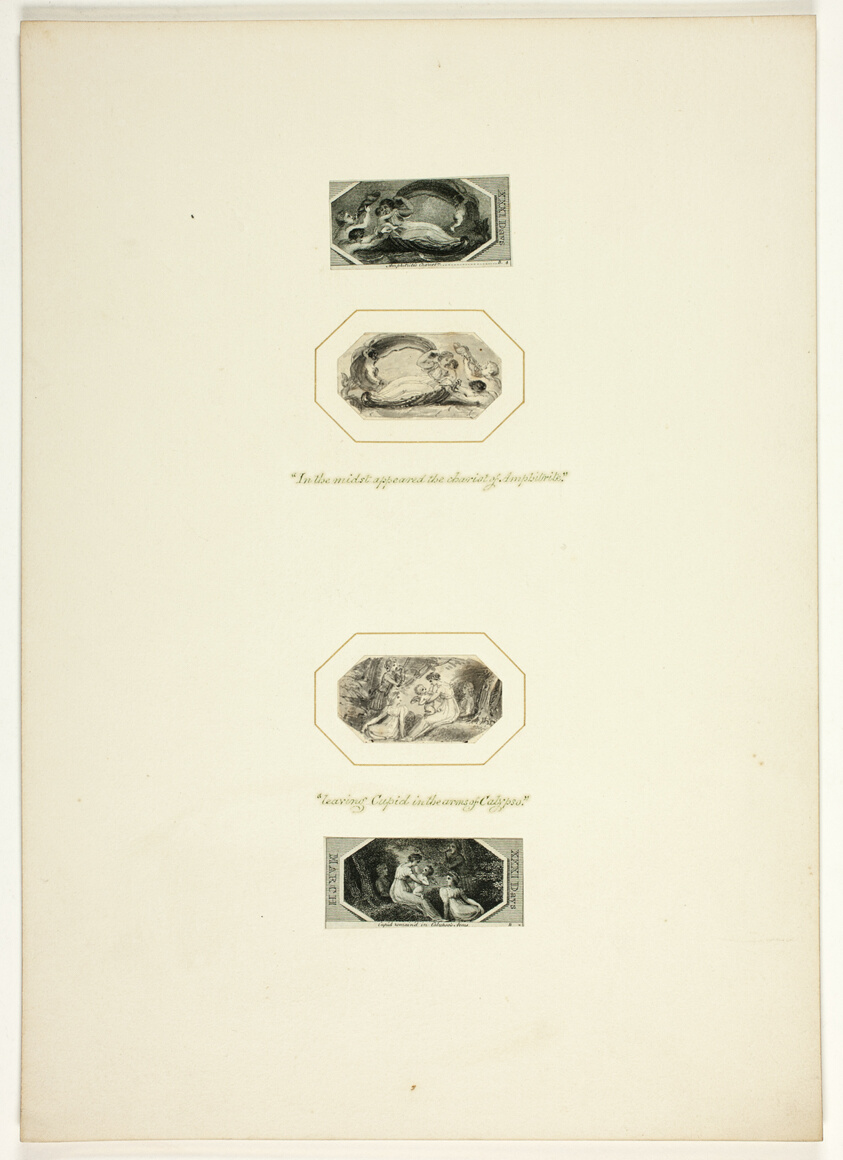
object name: Print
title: Plate from Telemachus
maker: after Thomas Stothard (English, 1755-1834); published by T. Baker (English, 19th century)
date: c. 1797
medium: Engraving on paper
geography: England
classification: engraving; drawings (visual works); prints and drawing; print